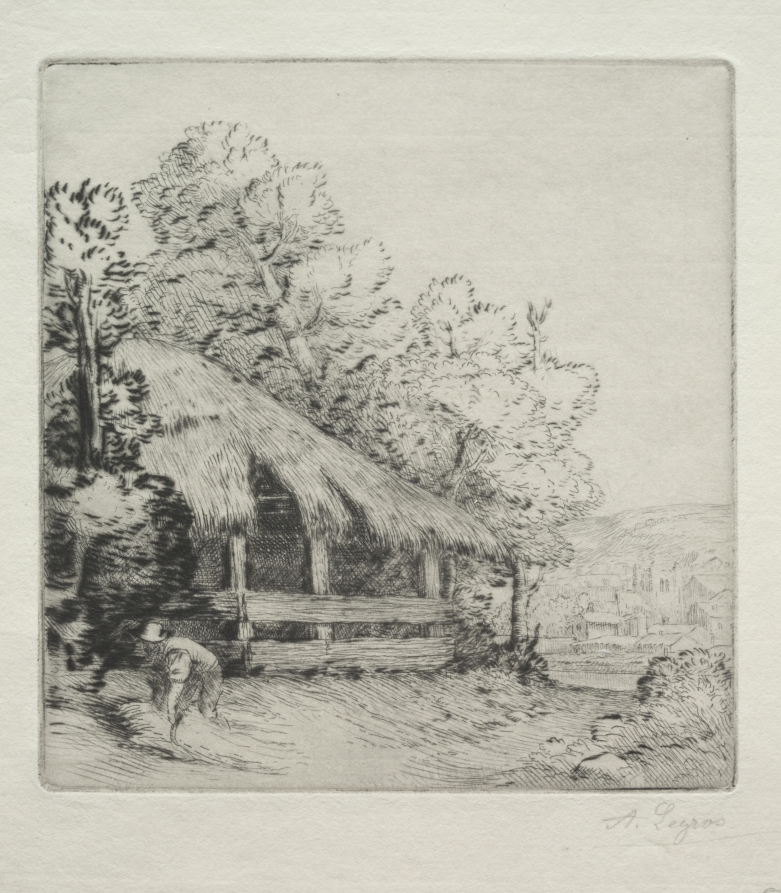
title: The Little Shed (Le Petit Hangar)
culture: France, 19th century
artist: Alphonse Legros (French, 1837–1911)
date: c. 1857–1911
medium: drypoint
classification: Print